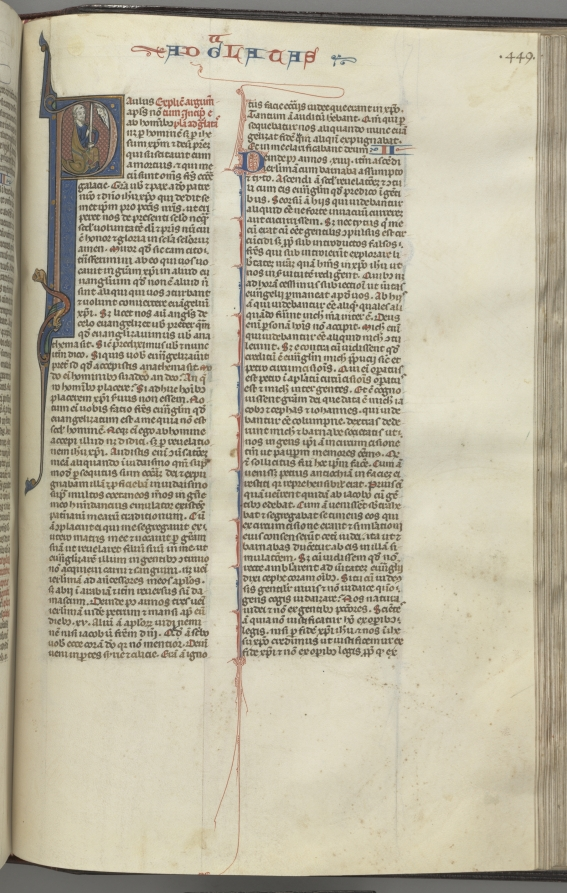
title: Fol. 449r, Galatians, historiated initial P, Paul seated with a sword, talking to the bust of God above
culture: Southern France, Toulouse(?), 13th century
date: c. 1275–1300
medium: ink, tempera and gold on vellum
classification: Bound Volume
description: Biblical manuscripts were highly prized and important possessions of churches, monasteries, cathedral schools, and universities throughout medieval Europe. The biblical texts were known as the vulgate, the translations made by Saint Jerome in the fourth century from Hebrew and Greek into Latin, which became the definitive and official Latin version of the Roman Church. In the 13th century, the bible was, for the first time, produced as a single volume with an officially sanctioned sequence to its books and chapters as illustrated by this example. The very extensive decoration of this bible is arranged hierarchically to indicate the relative importance of the various texts so that full or almost full-page initials mark the openings of the first prologue, Genesis, and the first Gospel; historiated initials mark the beginning of each book and illuminated initials mark the Prologues.